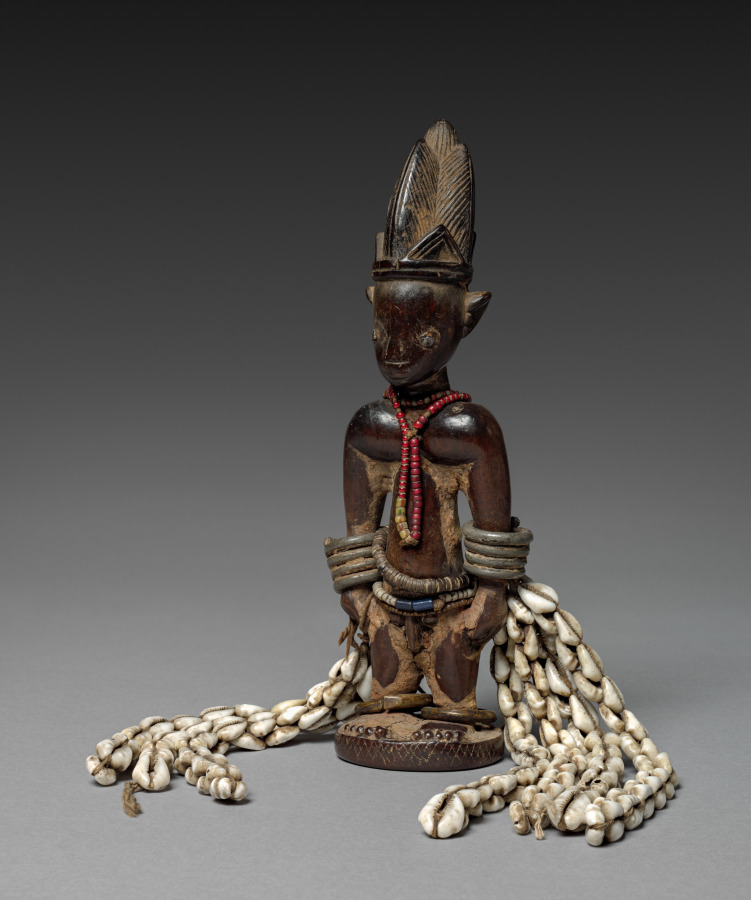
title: Twin Figure (Ère Ìbejì)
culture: Africa, West Africa, Nigeria, Yorùbá-style maker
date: late 1800s–early 1900s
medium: Wood, copper alloy, iron alloy, lead, glass beads, cowrie shells, twine, and pigment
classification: Sculpture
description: Such a figure is carved when a twin dies in infancy and serves as a memorial to the surviving sibling. These twin figures are always carved to look like adult individuals with idealized physical features. Various body adornments suggest the care parents devote to their children, while the erosion of facial features indicates the symbolic washing and feeding of the figure as a means to connect the soul of the deceased to that of the living twin.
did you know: This figure commemorates a twin that has died in infancy.